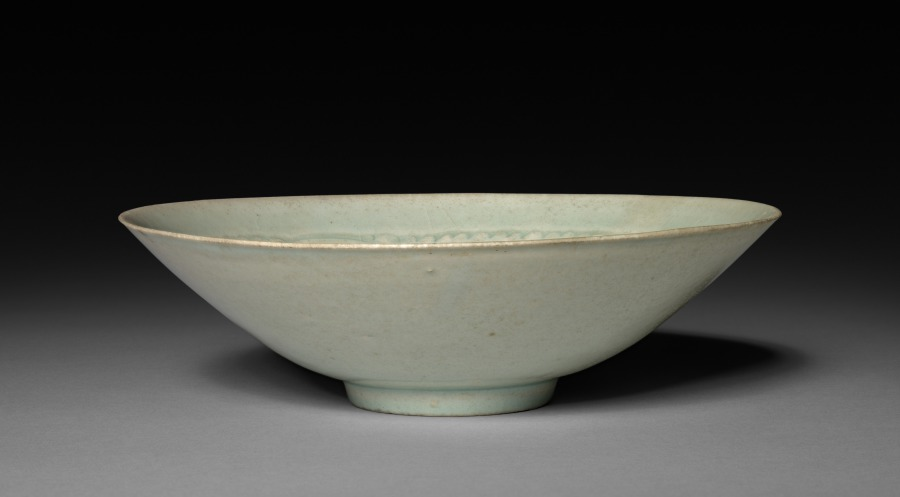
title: Bowl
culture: China, Southern Song dynasty (1127-1279)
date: 1100s–1200s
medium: Glazed porcelain, qingbai ("blue-white") ware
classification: Ceramic